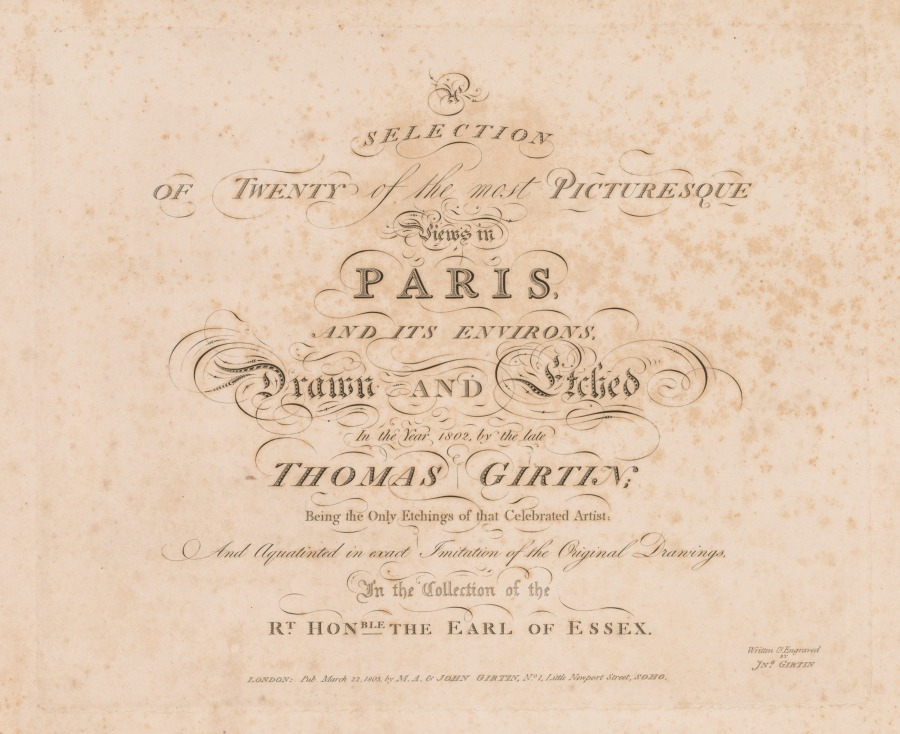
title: A Selection of Twenty of the Most Picturesque Views in Paris, And its Environs: Title Page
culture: England, 19th century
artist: John Girtin (British)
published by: M.A. & John Girtin, London 1803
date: 1803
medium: engraving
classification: Print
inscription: in plate: bottom, center: London: Pub. March 22. 1803 by M.A. and John Girtin, No. 1 Little Newport Street, Soho; bottom right corner: Written & Engraved by Jno. Girtin